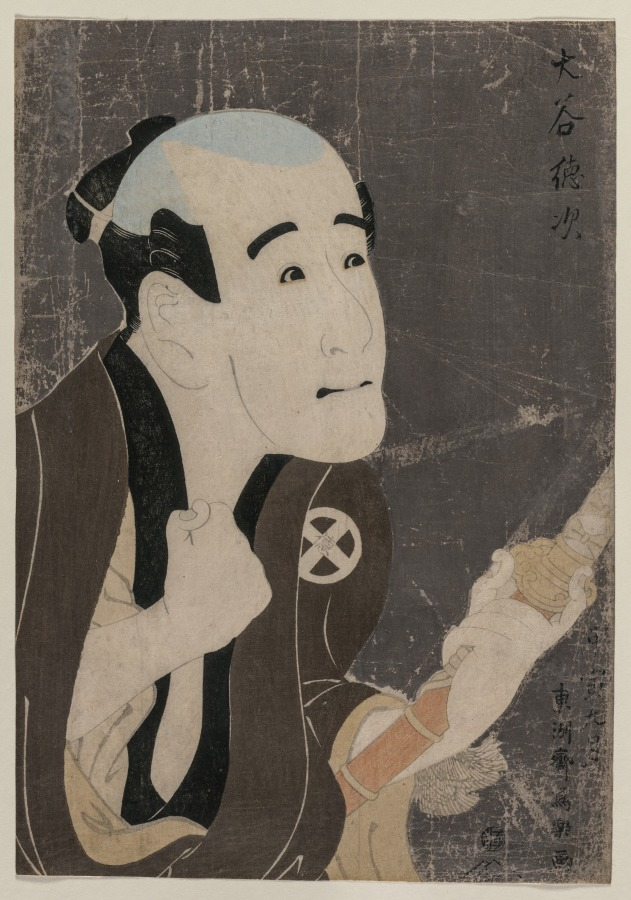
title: Otani Tokuji I as the Retainer Sodesuke in "Flowering Irises: A Soga Vendetta of the Bunroku Era"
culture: Japan, Edo period (1615–1868)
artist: Tōshūsai Sharaku (Japanese, active 1794–95)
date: 1794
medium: color woodblock print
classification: Print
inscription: Signature: Toshusai Sharaku ga (in lower right corner). Publisher: Tsutaya Juzaburo (emblem). Censorship Seal: kiwame.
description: Ōtani Tokuji I (1756–1808) portrays a servant in a play that follows two brothers as they pursue a villain who murdered their father and older brother and who stole their family’s secret scroll. This design belongs to a category of Japanese prints called “actor images” (yakusha-e or 役者絵). They were collected by fans of popular Kabuki actors. Kabuki is a kind of entertainment that got its start in the early Edo period, evolving from dance performances with simple storylines to long plays with complex plots, elaborate sets, and full musical accompaniments. Performers wear showy costumes and heavy makeup and strike poses called mie at critical moments in the narrative. Dialogue is spoken in a stylized way that resembles singing.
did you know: The clenched fist and mouth express the character’s determination.